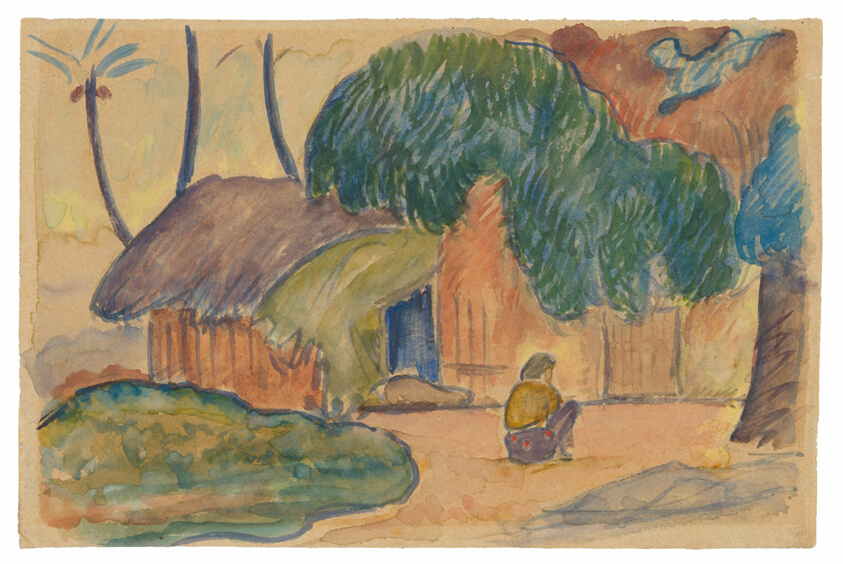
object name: Drawing and Watercolor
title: Tahitian Hut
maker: Paul Gauguin (French, 1848-1903)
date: 1891/93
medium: Watercolor, with touches of gouache, over graphite, on tan wove paper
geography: France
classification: watercolor; drawings (visual works); prints and drawing